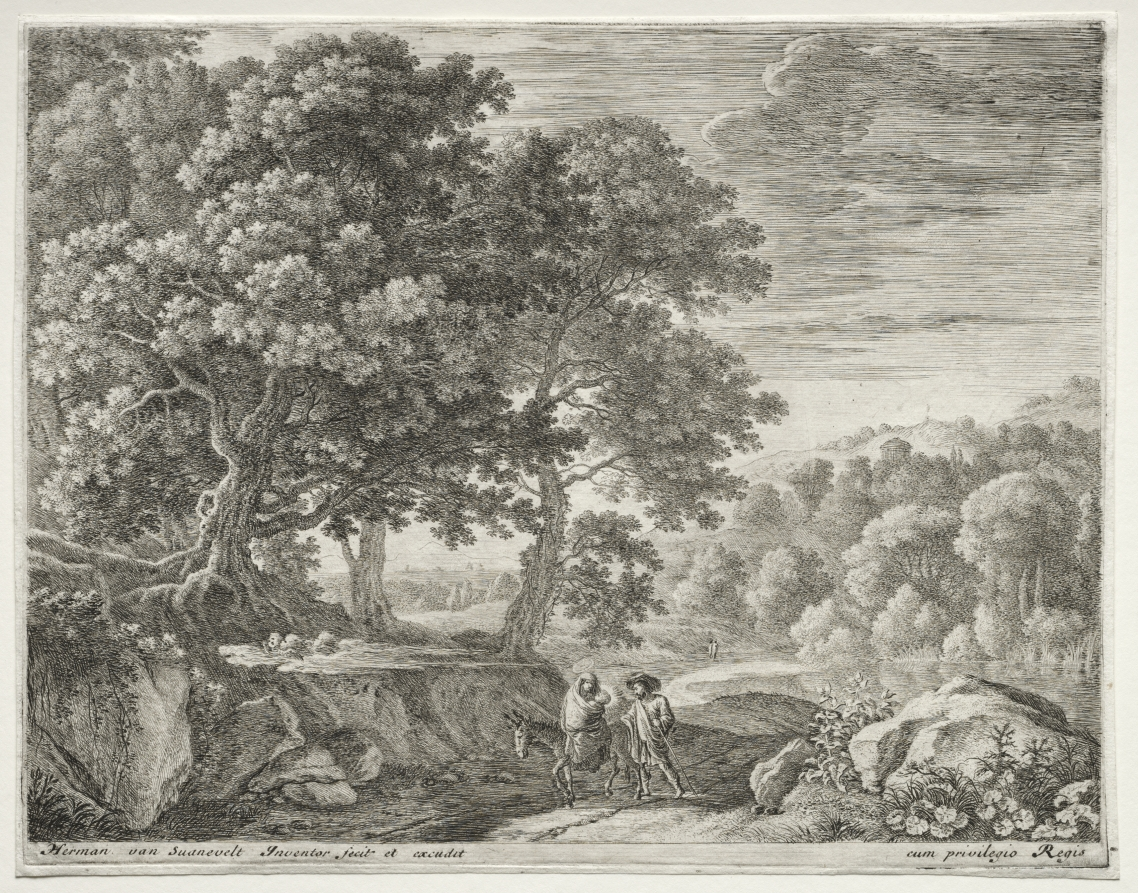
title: The Little Angels on the Hill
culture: Netherlands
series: The Flight into Egypt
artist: Herman van Swanevelt (Dutch, c. 1600–1655)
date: c. 1652–54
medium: etching and engraving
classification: Print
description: This series by Herman Swanevelt, The Flight into Egypt, illustrates an event from the New Testament of the Bible. Joseph, Mary, and Christ fled into Egypt to escape King Herod's persecution. Traditionally represented as a single image, Swanevelt enlarged the story into four scenes. The Holy family is first shown traveling with three angels behind them, then Joseph helps Mary off the donkey, next Joseph leads the donkey to water as Mary changes the child, and finally the family is at rest. However, the main focus of each of these prints is the depiction of landscape, a genre that reached unprecedented levels of popularity during the 1600s. The scenery, looking much more like the Italian countryside than Egypt, was inspired by Swanevelt's paintings. Although he was Dutch, he spent most of his career in Paris and Rome. As a painter, he was known for his ability to convey warm, glowing sunlight, a quality also found in his etchings.